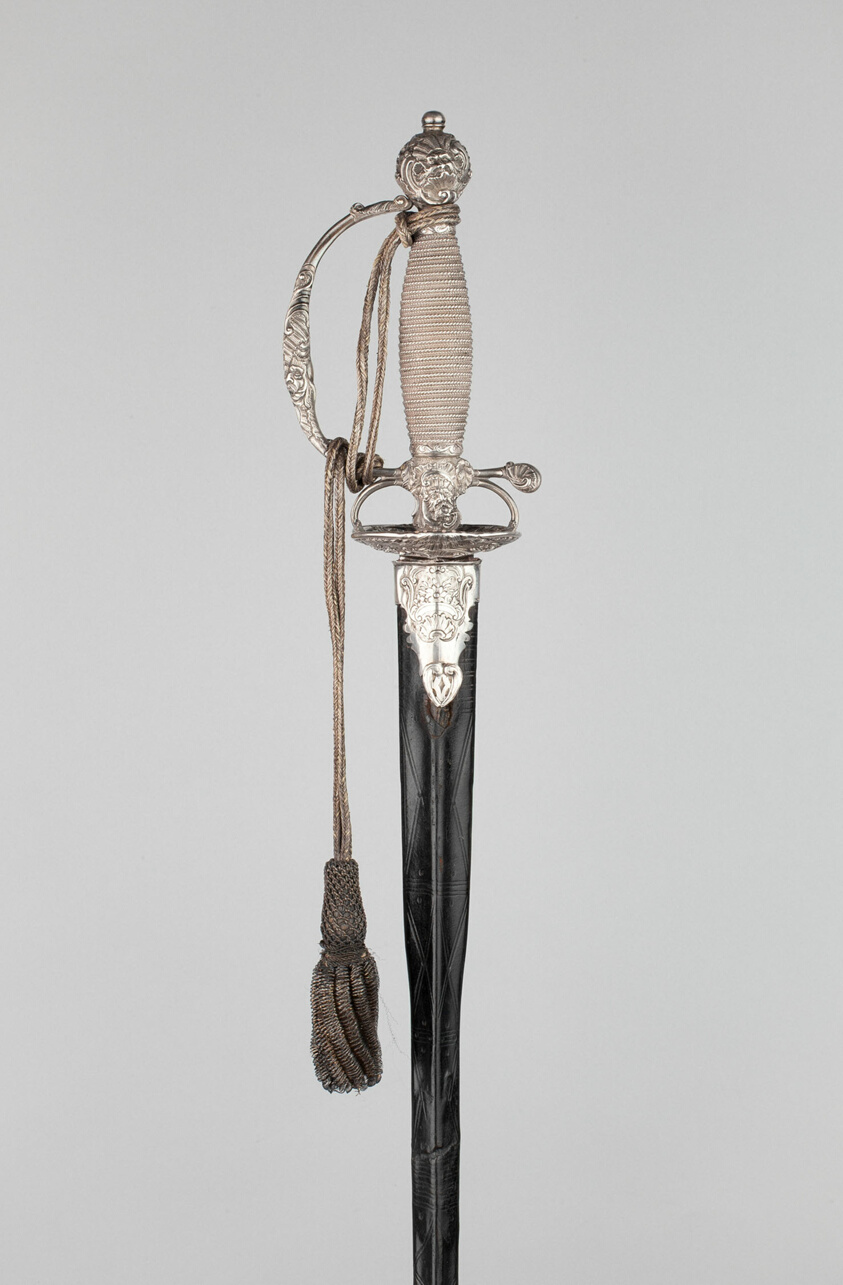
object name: Arms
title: Smallsword and Scabbard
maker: Silversmith: John Berthellot (English); Cutler: Matthew Feesey (English, 1703-1769), London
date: 1744/45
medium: Steel, silver, wood, leather, silver thread, and textile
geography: England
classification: edged weapon-sword; arms; arms and armor